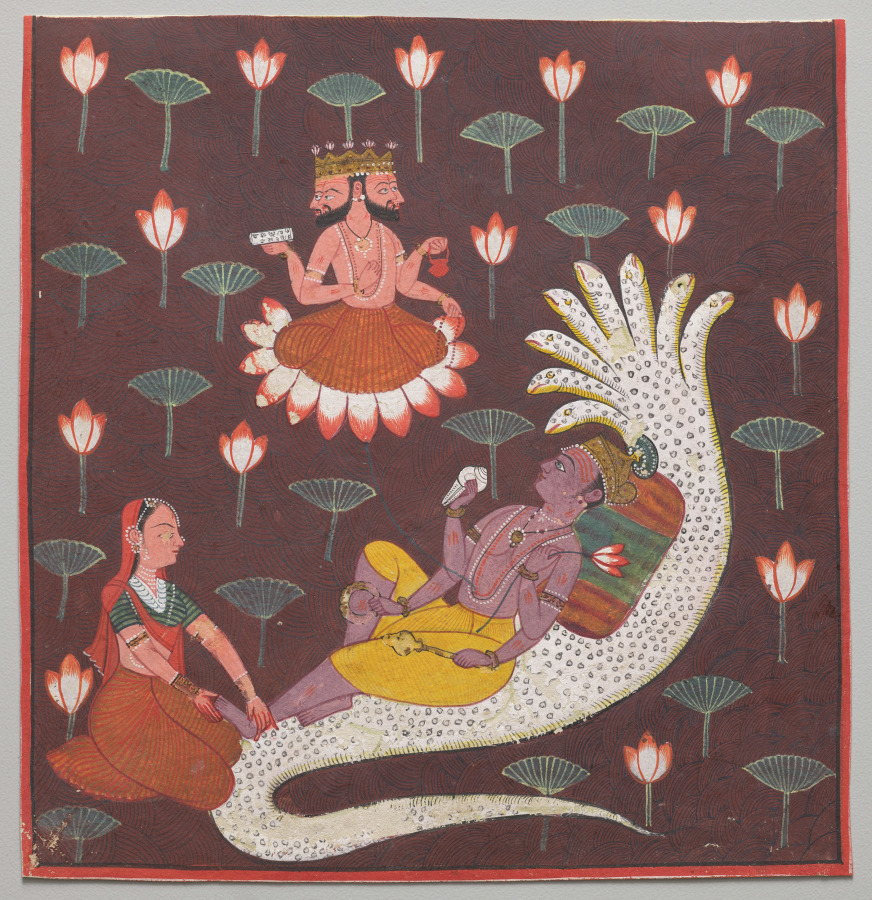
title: Vishnu on Ananta, the Endless Serpent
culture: Northern India, Himachal Pradesh, Pahari Region, Rajput Kingdom of Chamba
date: c. 1700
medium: Gum tempera and gold on paper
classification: Painting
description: Before the creation of the world, the god Vishnu was asleep on the serpent Ananta, floating on the cosmic ocean. When the time came for him to create the world, Vishnu’s wife Lakshmi woke him gently by massaging his feet. Then, out of his navel emerged a lotus flower, and Vishnu gave birth to Brahma, the god of creation. As plants that grow in water, lotus flowers indicate the presence of the waters and their life-affirming capacity. In this painting they are boldly distributed over a deep brown background with basket-weave patterning.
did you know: The artist has depicted Vishnu’s oceanic abode as a lotus pond.